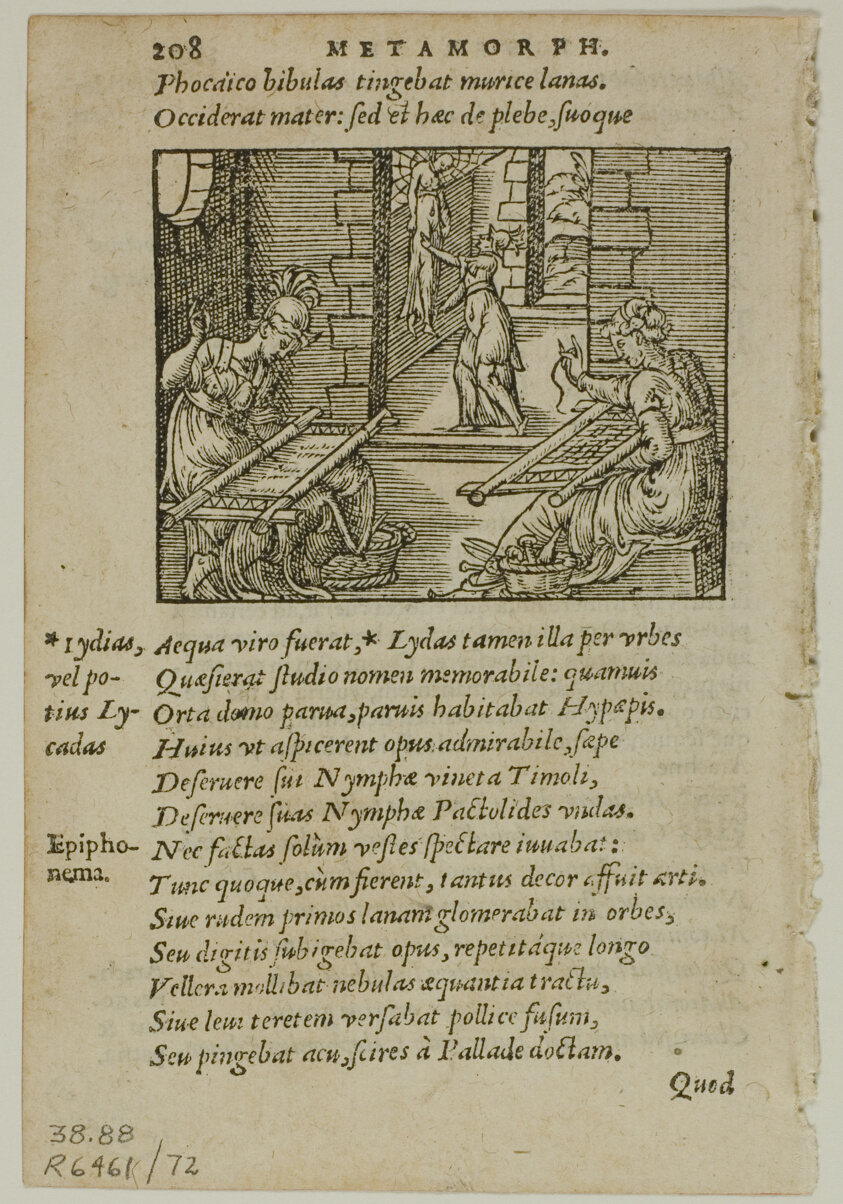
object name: Print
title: Illustration from Metamorphosis by Ovidius, plate 72 from Woodcuts from Books of the XVI Century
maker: Unknown Artist (French, 16th century); assembled by Max Geisberg (Swiss, 1875-1943)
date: 1575, assembled into portfolio 1937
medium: Woodcut on paper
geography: France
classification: woodcut; print; prints and drawing